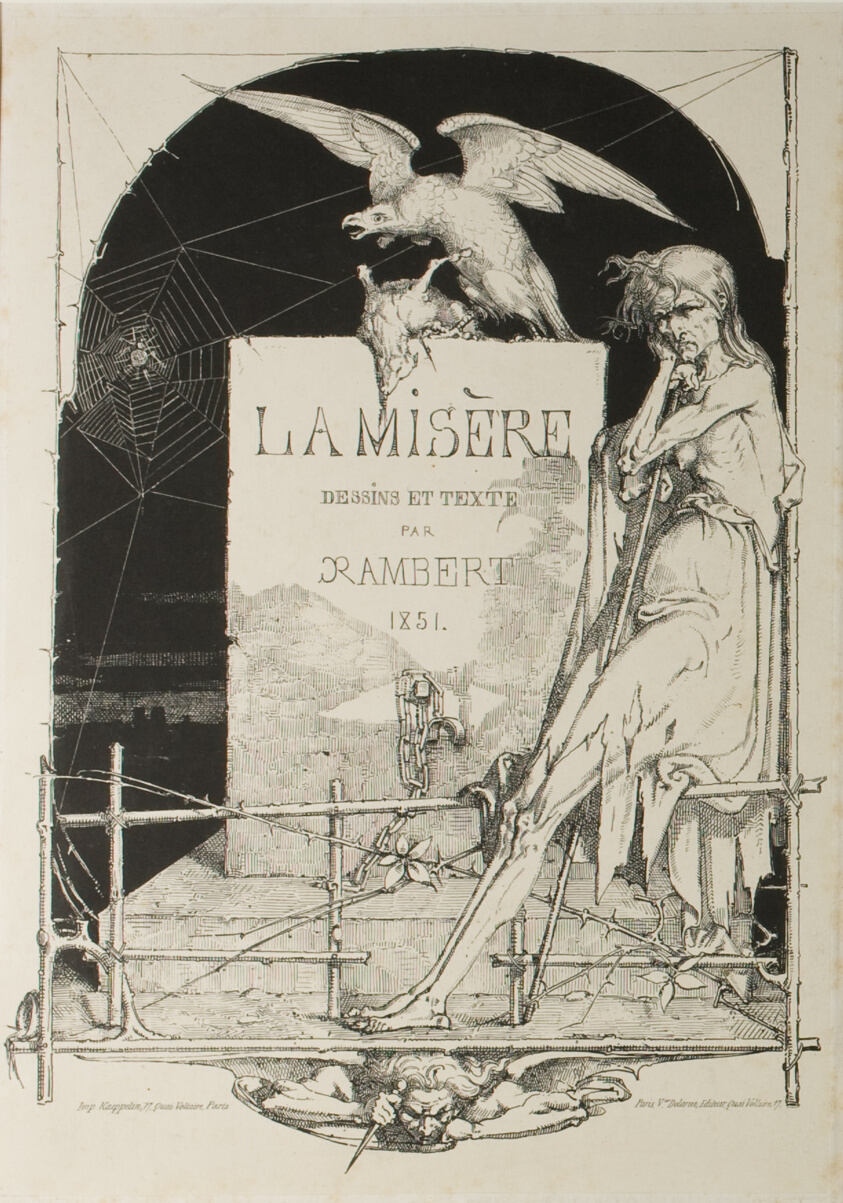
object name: Print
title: Title Page from Misery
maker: Charles Rambert (French, active 1836–1867); printed by Kaeppelin; published by Victor Delarue (French, 19th century)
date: 1851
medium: Lithograph in black on cream China paper, laid down on ivory wove paper (chine collé)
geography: France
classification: lithograph; print; prints and drawing